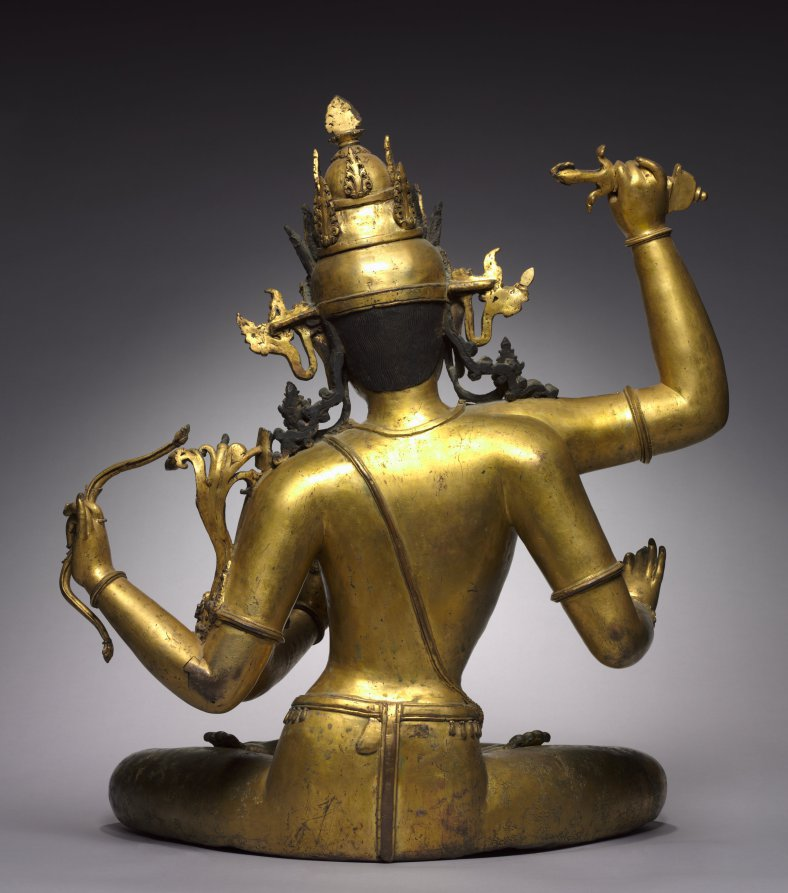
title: Bodhisattva of Wisdom (Manjushri)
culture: Nepal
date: 1400s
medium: Gilt bronze with precious and semiprecious stones, gum tempera, and cold gold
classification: Sculpture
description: This image depicts one of the main bodhisattvas, beings only one stage away from full enlightenment. Because the historical Buddha was a prince prior to his renunciation and life as a wandering ascetic, bodhisattvas are depicted as royal princes. This example has the sharp features, sweet expression, and crisp details characteristic of images made in Nepal during the 1400s. In his upraised right hand Manjushri holds the hilt of a sword that, like wisdom itself, metaphorically cuts through and defeats ignorance. His lower, rear left hand grasps a bow, once probably strung with a wire. Also missing is the arrow that he likely held in his lowered right hand. Arrows were often symbols for mantras, or strings of syllables thought to have the power to focus the mind and work like missiles to destroy negativity and affliction. The gesture of his lowered left hand indicates the transmission of Buddhist teachings. The lotus stem that rises at the left elbows originally held a book of sutras. This figure is in the yogic posture of meditation with the big toe flexed in concentration. Yoga is of central importance in tantric Buddhism, because high-level practitioners are able to discipline the body to such an extent that the mind can also be controlled.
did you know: The bodhisattva's short breeches are patterned in spiraling floral forms incised into the metal.